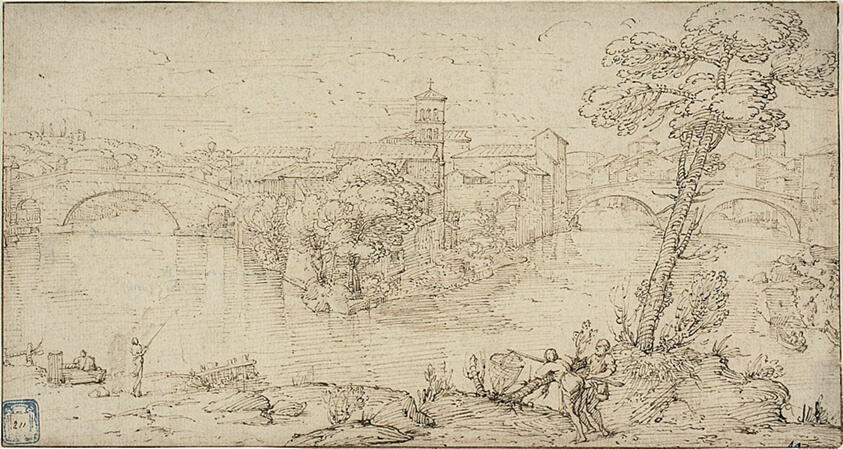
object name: Drawing and Watercolor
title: View of Isola Tiberina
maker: Giovanni Francesco Grimaldi (Italian, 1606-1680)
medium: Pen and brown ink on buff laid paper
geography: Italy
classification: pen and ink drawings; drawings (visual works); prints and drawing